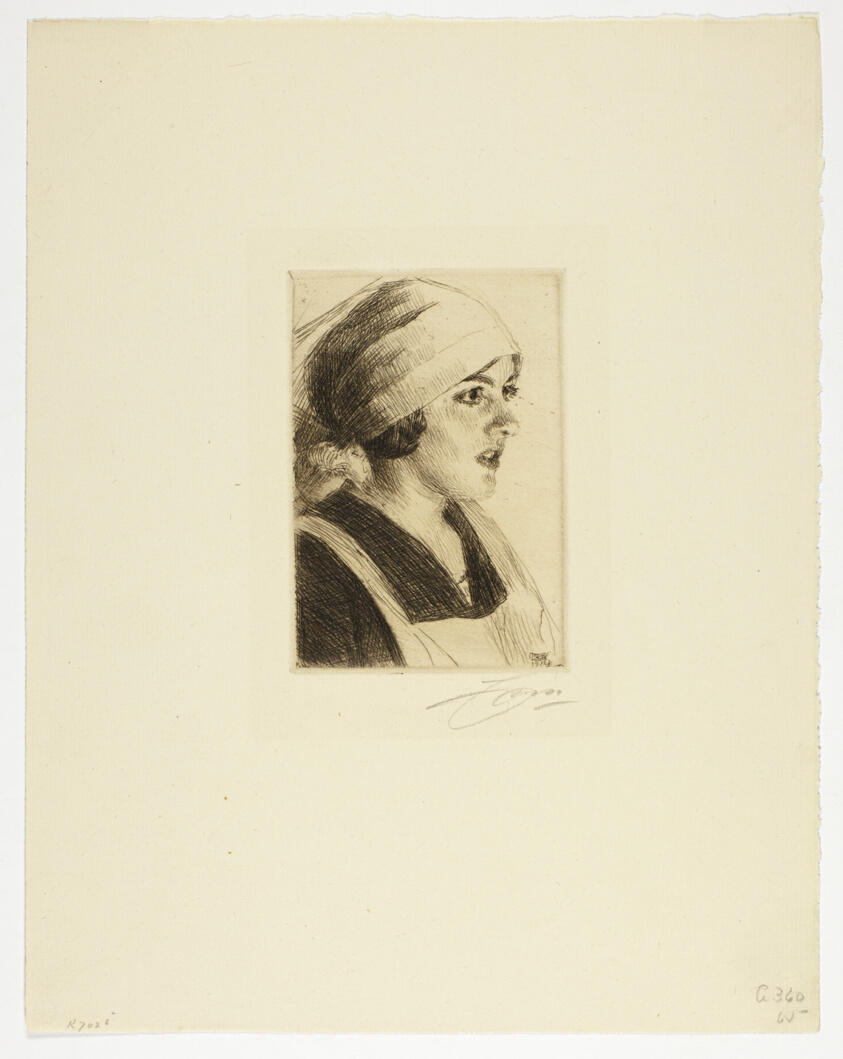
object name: Print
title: Gulli I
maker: Anders Zorn (Swedish, 1860-1920)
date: 1914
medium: Etching in black on cream laid paper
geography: Sweden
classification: etching; paper; print; prints and drawing